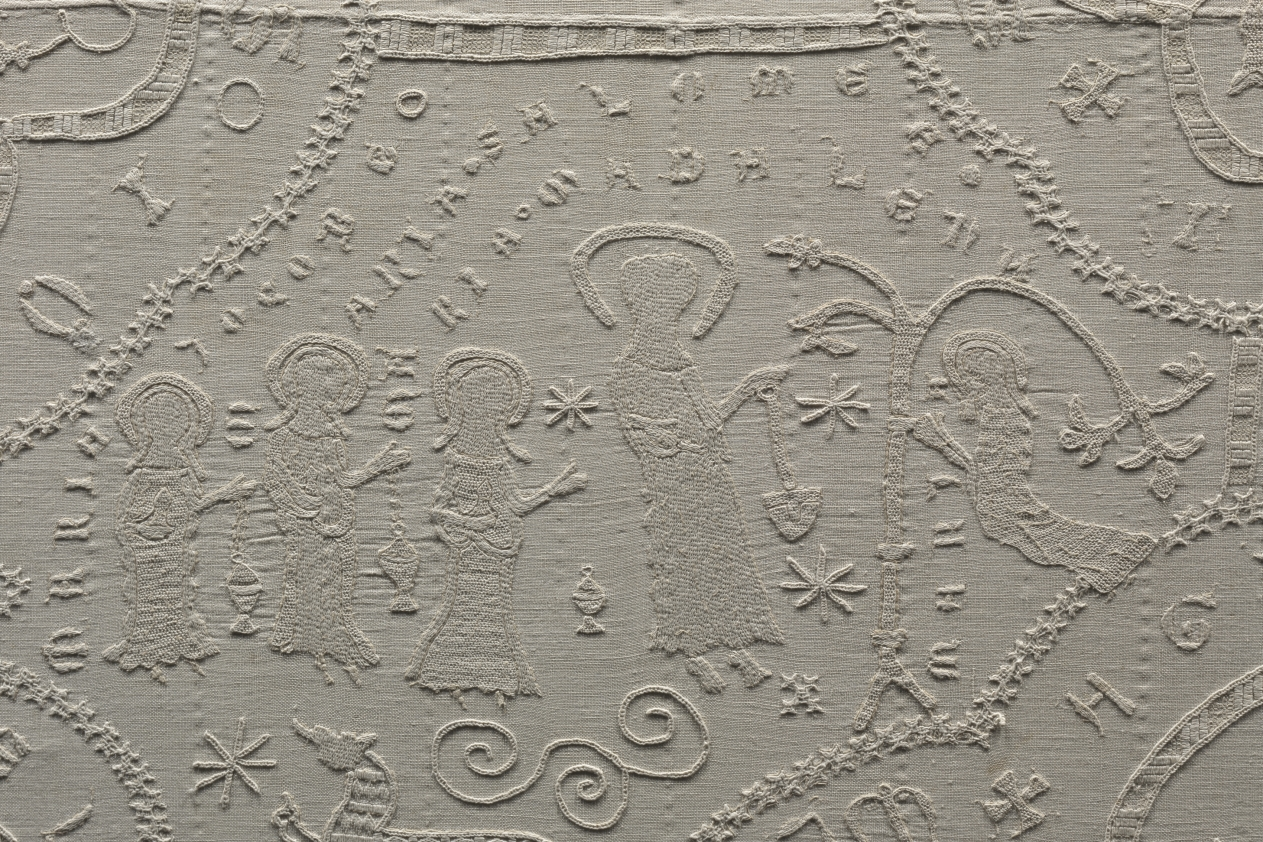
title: Altar Cloth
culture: Germany, Altenberg on the Lahn, Premonstratensian Convent, 14th century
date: c. 1350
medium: embroidery: linen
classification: Embroidery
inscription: various motifs enclosed in quatrefoils with identifying inscriptions in Gothic letters.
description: This large, embroidered altar cloth is one of the rarest, most important medieval church furnishings in existence. It was stitched by nuns in the Premonstratensian Convent in Altenberg on the Lahn River, north of Frankfurt, Germany, and was used to cover the church’s high altar in the weeks leading up to Easter. The cloth is an example of linen embroidery, a specialty of German nuns in the later Middle Ages. The Altenberg monastery church once had valuable furnishings; the high altar retable (a decorated frame with sculptures and paintings on the top of an altar) has survived, the main parts of which are now in the Städel Museum in Frankfurt, Germany.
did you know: When lit from behind, the previously hidden details emerge and the complex design becomes evident.